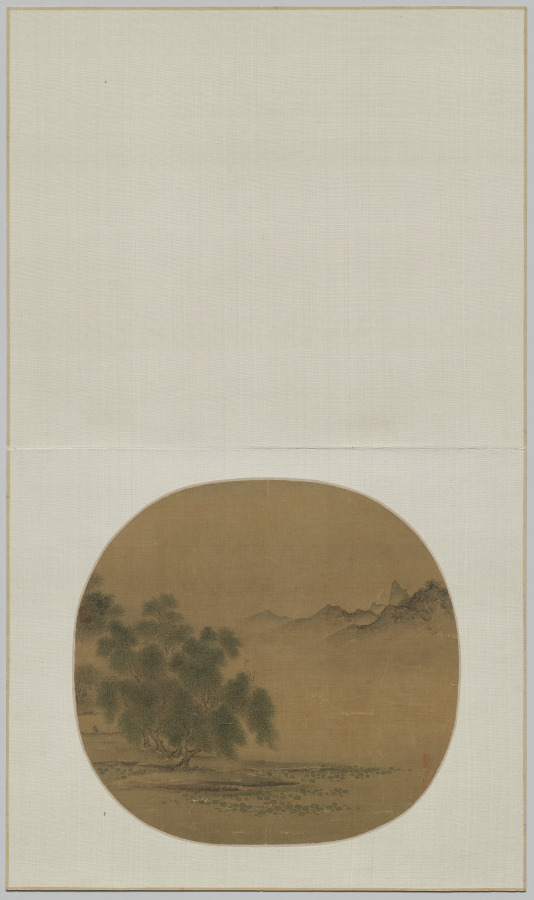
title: Willows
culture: China, Southern Song dynasty (1127–1279)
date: 1100s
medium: album leaf; ink and light color on silk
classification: Painting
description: A single scholar in a skiff drifts beneath shade-giving willows and savors his view of mountain peaks just emerging from the pervasive river mist. Round lotus leaves and vertical marsh reeds join with the dotted grasses and curving willow leaves to provide considerable textural variety within the foreground area, which contrasts with the more irregular texturing of the distant mountains. Misty space plays an active part in the composition, and the components of the painting are organized around bisecting diagonals.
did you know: This river scene features low-lying spits of land surrounded by lotuses and bands of mist floating amid overhanging willows.